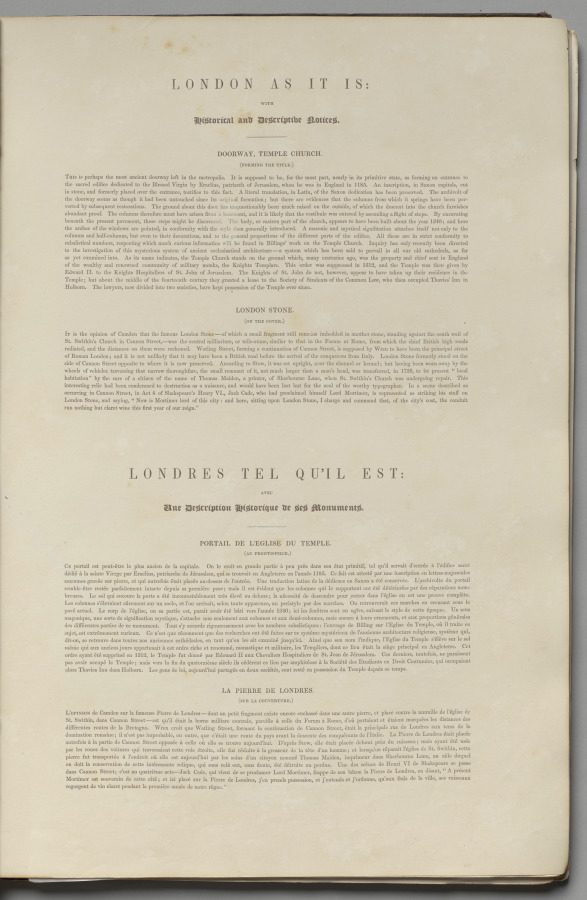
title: London As It Is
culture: England, 19th century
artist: Thomas Shotter Boys (British, 1803–1874)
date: 1842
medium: lithograph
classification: Bound Volume